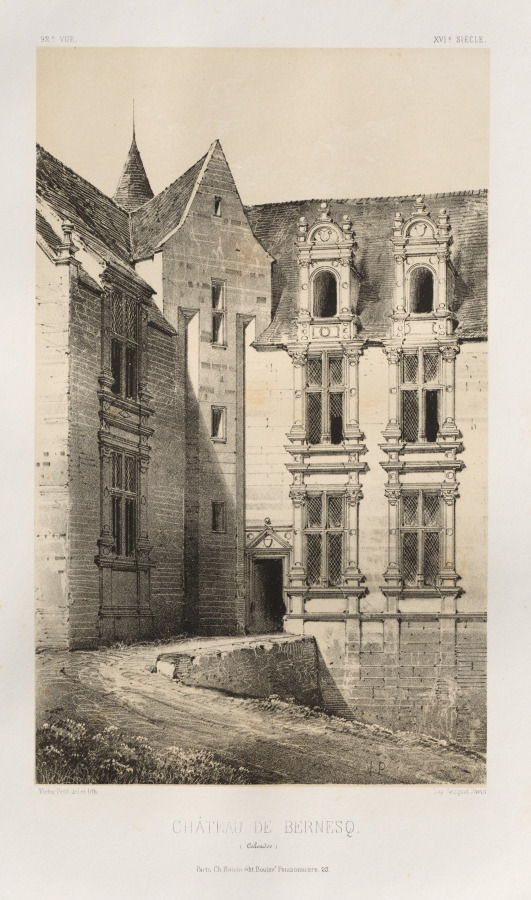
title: Architecture Pittoresque ou Monuments des XVeme. Et XVIeme. Siecles: Chateaux de France des XV et XVI Siecles: Pl. 92, Château de Bernesq (Calvados)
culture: France, 19th century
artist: Victor Petit (French, 1817–1874)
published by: Charles Boivin (publisher and editor); Lith de Godard a Paris (printer)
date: 1860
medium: lithograph with tint stone, from portfolio of 100 lithographs with tint stone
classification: Print